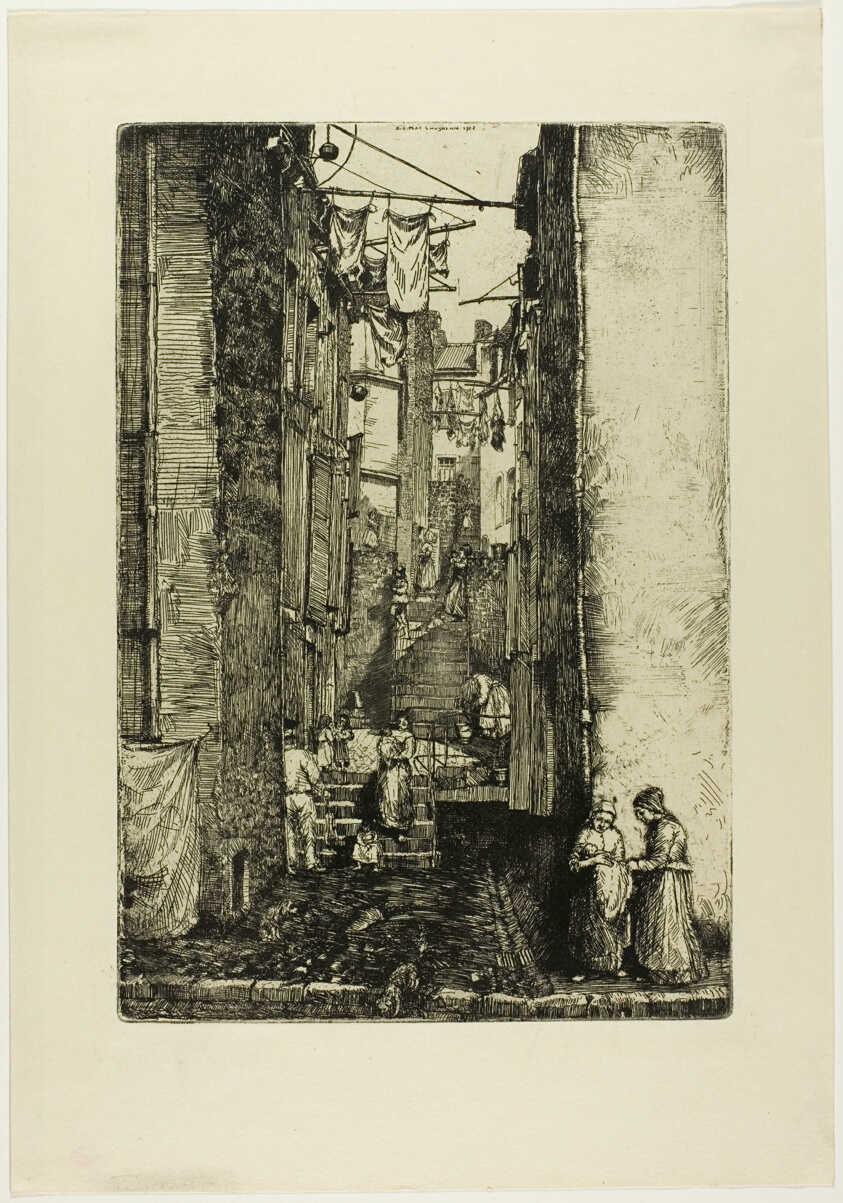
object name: Print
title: Ruelle du Pêcheur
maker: Donald Shaw MacLaughlan (American, born Canada, 1876-1938)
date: 1902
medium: Etching in black on cream wove paper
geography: United States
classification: etching; print; prints and drawing